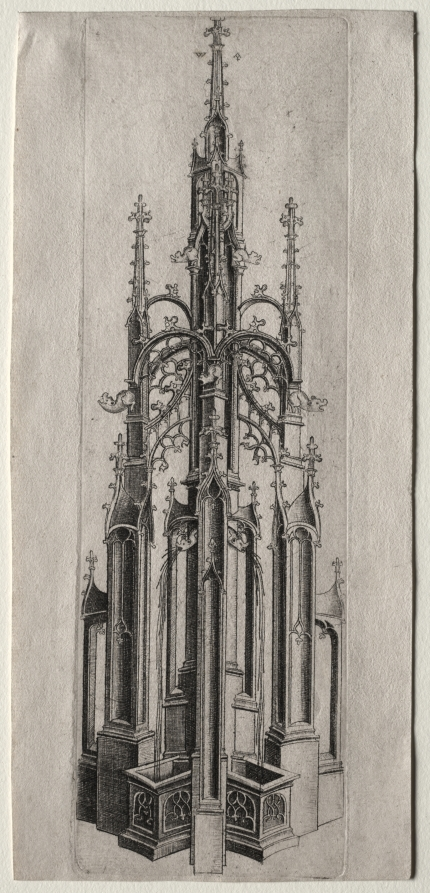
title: Design for a Gothic Fountain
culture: Flanders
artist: Master W with the Key (Netherlandish, active about 1465–1490)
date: c. 1470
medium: engraving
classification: Print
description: Many early engravers used the medium to create motifs for craftsmen. The design for this Gothic fountain calls for the work to be executed in gold or silver and for scented water to spout from the gargoyle heads into the square, carved basins below. Like the great majority of prints by Master W with a Key, this sheet illustrating a design for a fountain is very rare, and only a few impressions are known. Offset on the verso is the faint image of a ship, a subject that inspired eight other engravings.